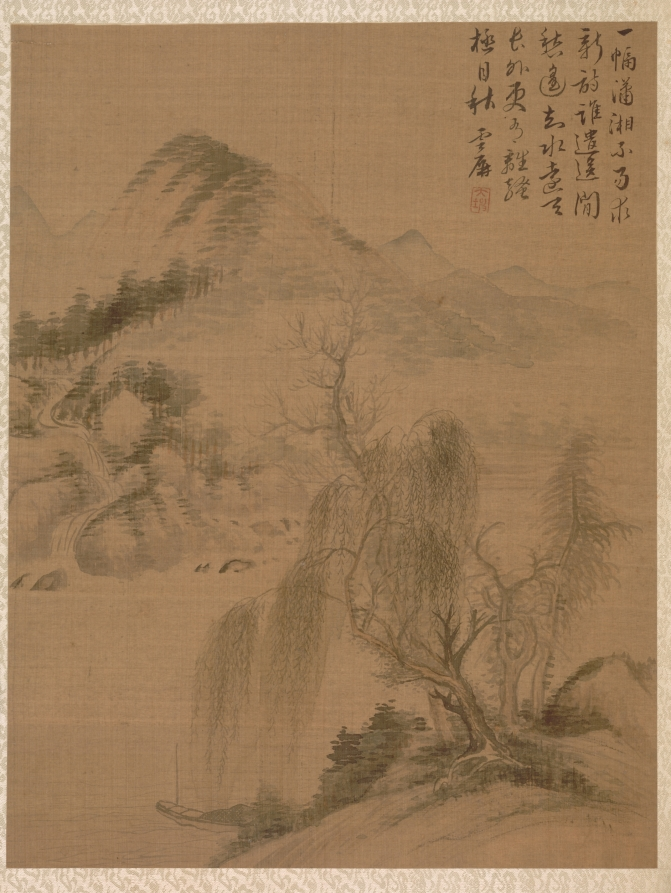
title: Landscape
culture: China, Qing dynasty (1644-1911)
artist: Zhai Dakun (Chinese, d. 1804)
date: 1775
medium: album leaf; ink and color on silk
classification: Painting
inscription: Willow and Waterfall. Traveling on distant waters, beyond the vast sky, There is still ______, autumn as far as the eye can see. Yunping. Seal: r/r "Dakun"